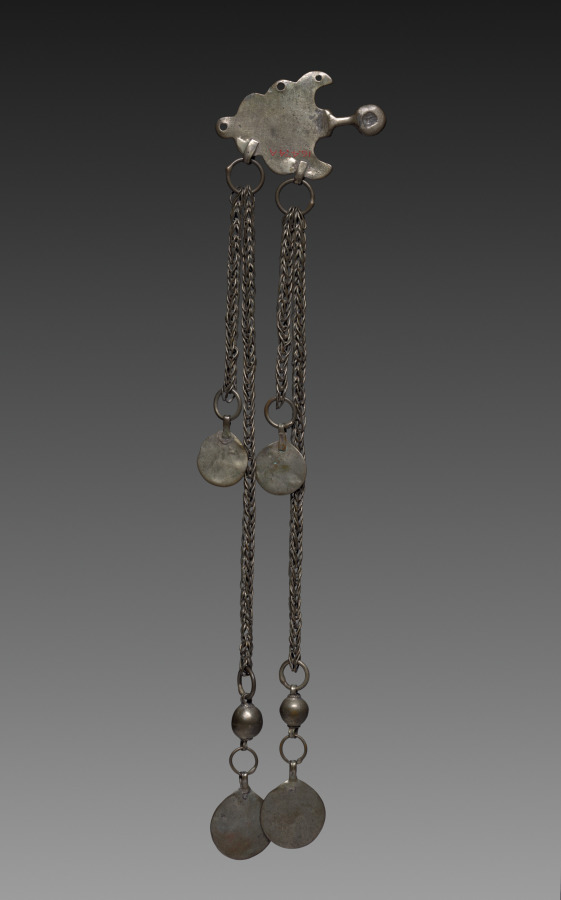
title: Clasp (part 2)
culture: Palestine, Ramallah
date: early 1900s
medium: silver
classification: Jewelry